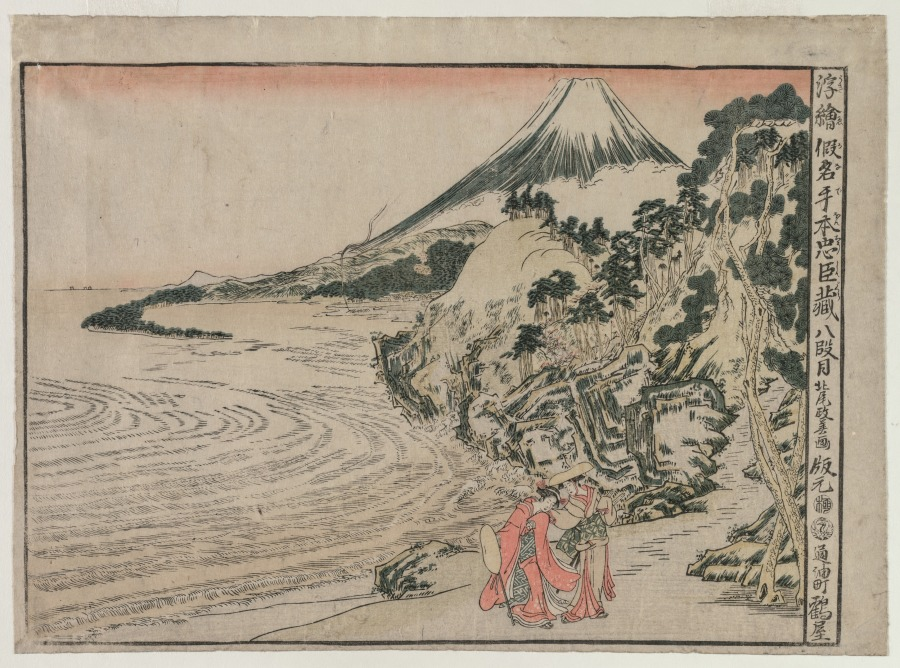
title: Chushingura: Act VIII (from the series Perspective Pictures for The Treasure House of Loyalty)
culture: Japan, Edo period (1615–1868)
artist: Kitao Masayoshi (Japanese, 1761–1824)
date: c. 1790s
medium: color woodblock print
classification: Print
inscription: Signature: Kitao Masayoshi ga Publisher: Tsuruya Kiemon (hammoto Toriaburacho Tsuruya, emblem) Censorship Seal: kiwame